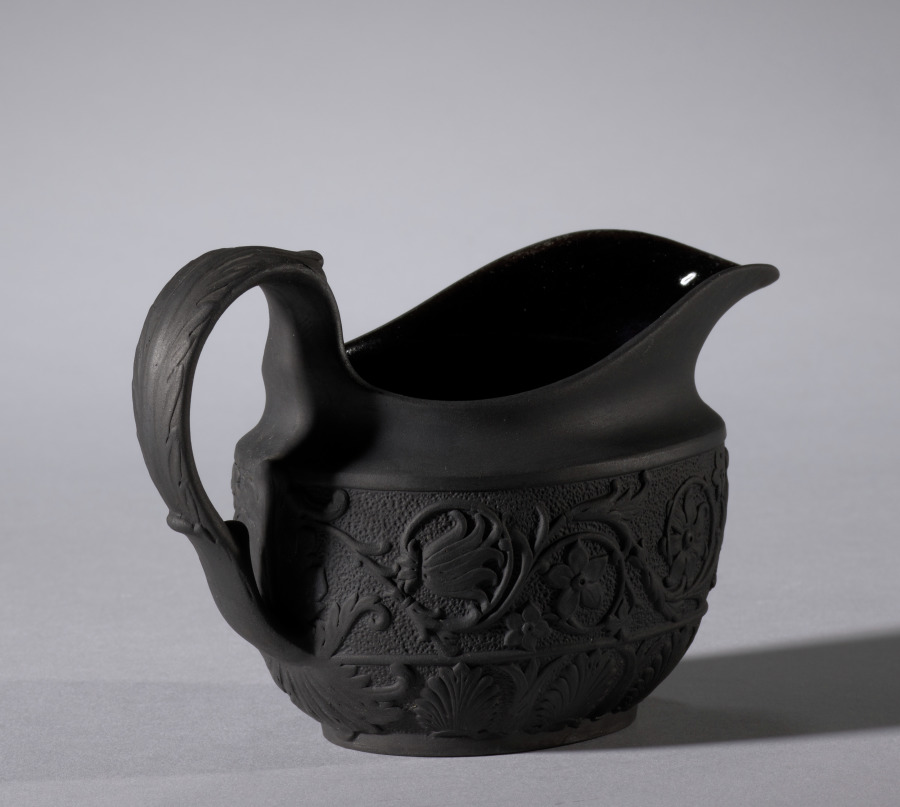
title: Creamer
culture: England, 19th century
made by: Elijah Mayer (British, c. 1770–1805)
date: c. 1810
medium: black basalt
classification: Ceramic